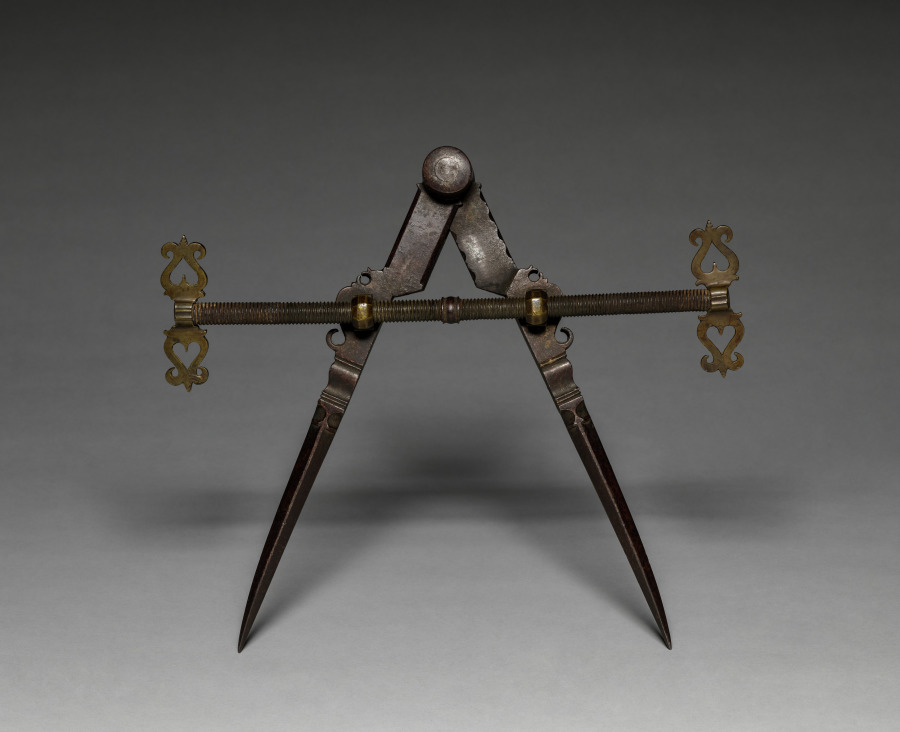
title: Dividers with Regulator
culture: Germany (?)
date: 1500s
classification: Tool